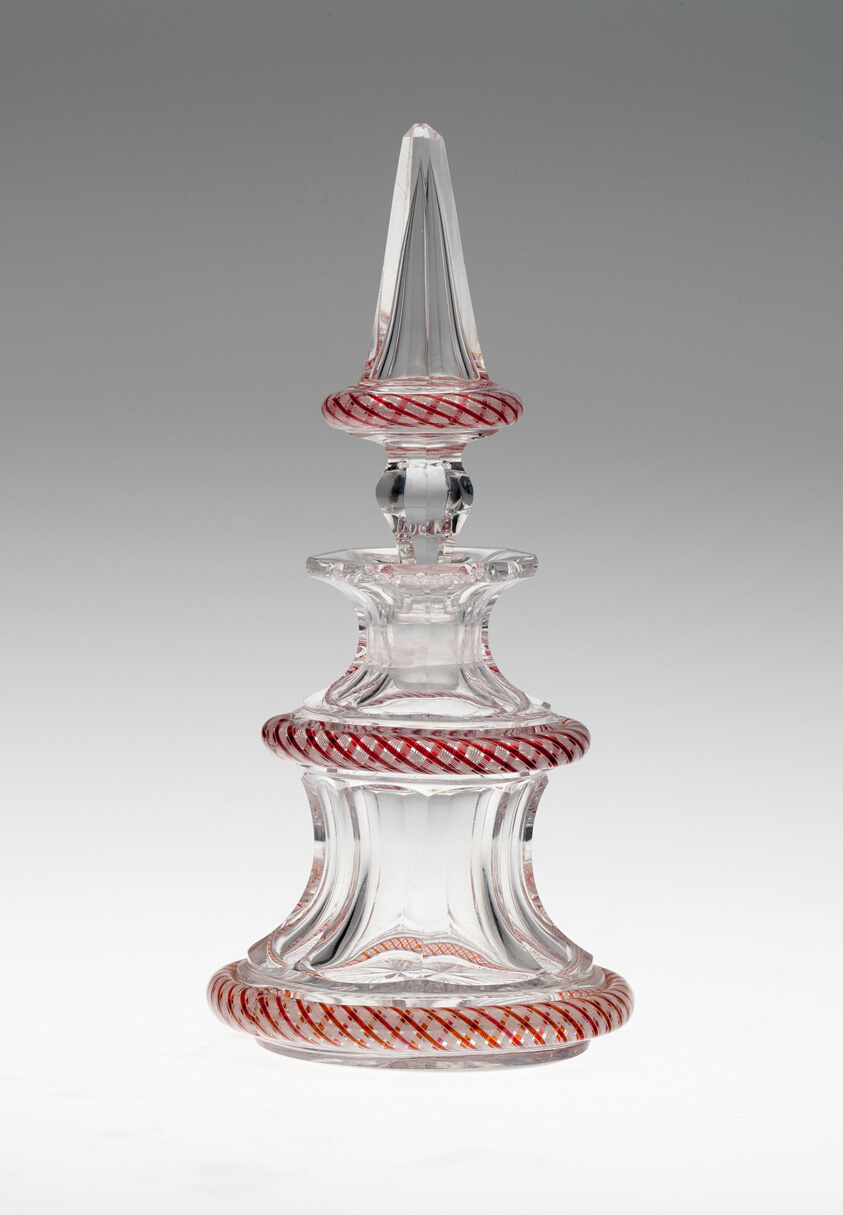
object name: Glass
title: Perfume Bottle with Stopper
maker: Baccarat Glassworks (Cristalleries de Baccarat); Lorraine, France, founded 1764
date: Late 19th century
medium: Glass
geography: Lunéville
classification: glass; european decorative arts